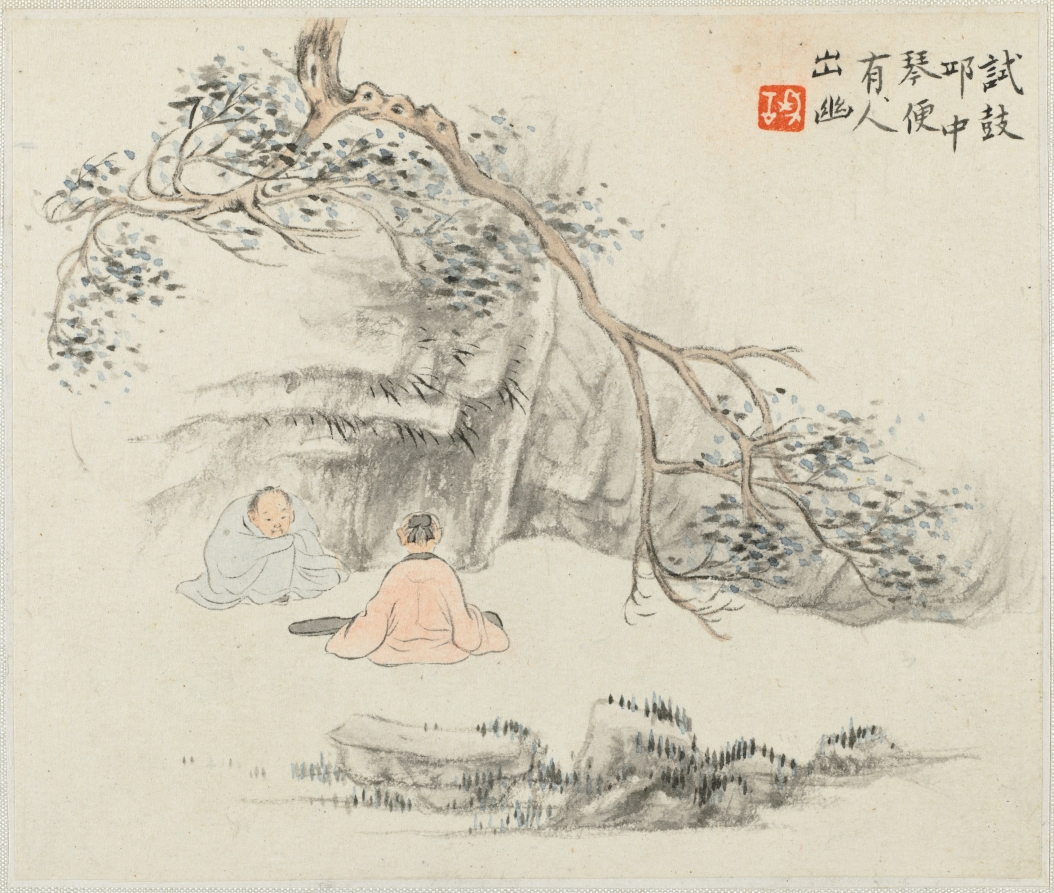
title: Album of Landscape Paintings Illustrating Old Poems: Listening to the Qin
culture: China, Qing dynasty (1644–1911)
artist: Hua Yan (Chinese, 1682–c. 1765)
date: 1745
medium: album leaf; ink and light color on paper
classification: Painting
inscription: 試鼓邱中琴，便有人出幽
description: The figure in pink is playing a qin, a seven-stringed zither. The sound of the musical instrument symbolizes the harmony between humanity and nature; literati are often depicted playing qin in landscape settings.